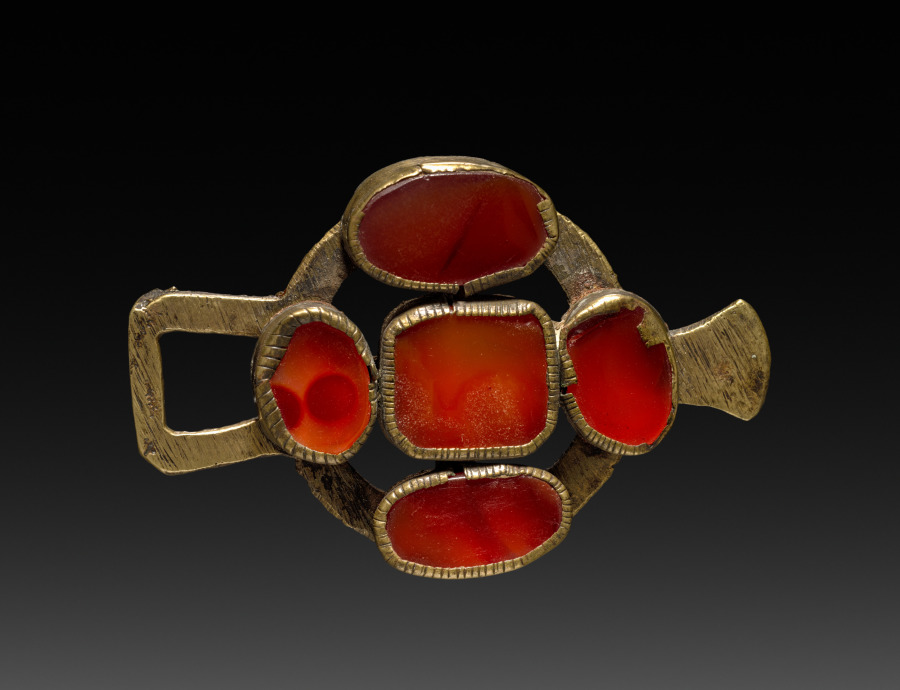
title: Clasp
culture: Tibet(?)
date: 1800s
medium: silver with cornelian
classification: Jewelry